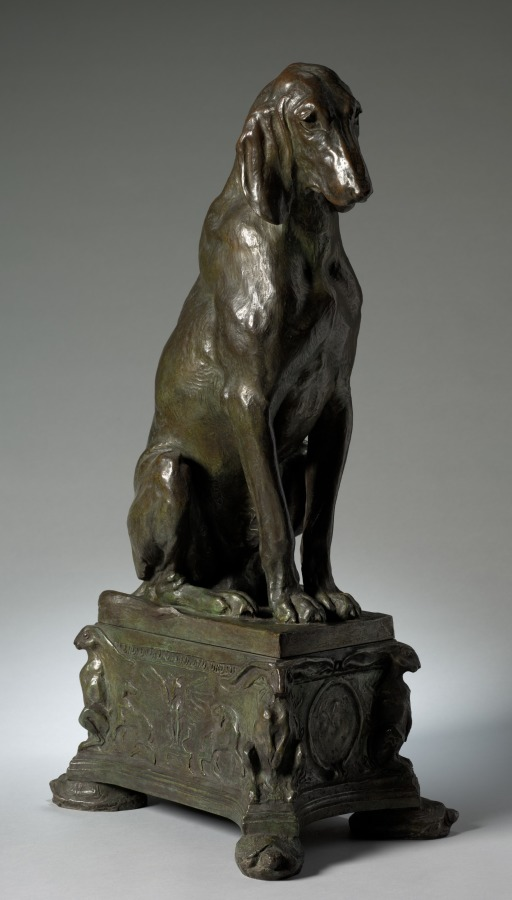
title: Hound (1 of 2)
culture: America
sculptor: Charles Cary Rumsey (American, 1879–1922)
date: 1912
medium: bronze andiron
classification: Sculpture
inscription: Signed on plinth: © C. C. Rumsey